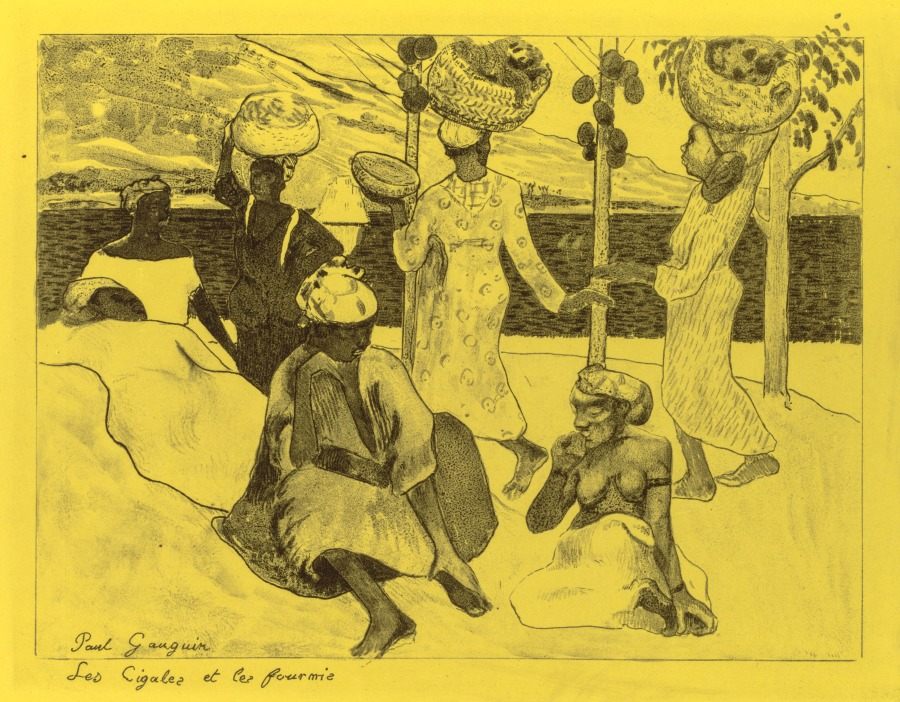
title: Volpini Suite: The Grasshoppers and the Ants (Les Cigales et les Fourmis)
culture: France, 19th century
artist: Paul Gauguin (French, 1848–1903)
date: 1889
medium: zincograph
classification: Print